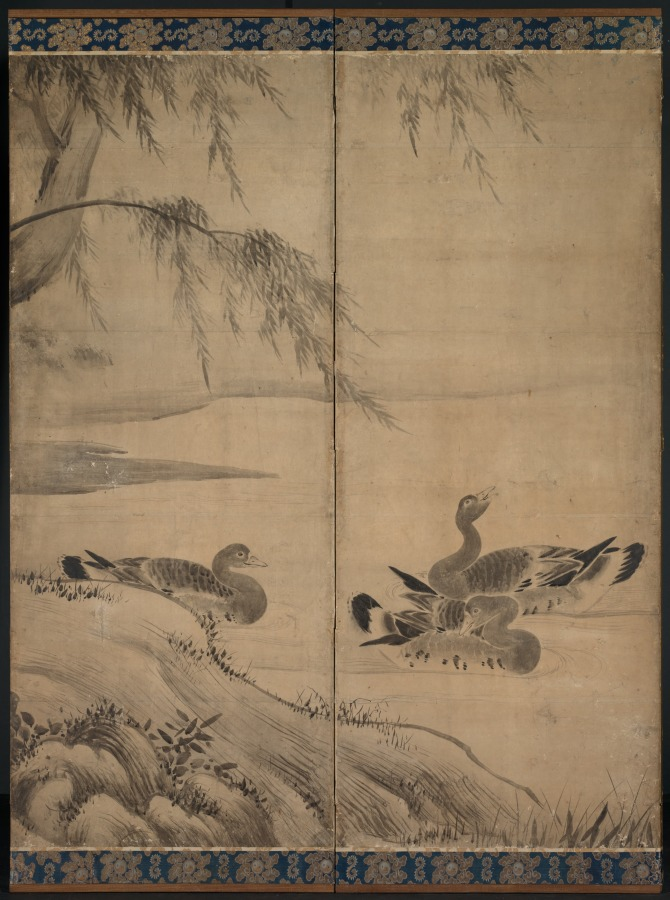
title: Wild Geese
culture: Japan, Edo period (1615–1868)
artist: Kano Sanraku (Japanese, 1559–1635)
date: late 1500s-early 1600s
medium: pair of six-fold screens; ink on paper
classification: Painting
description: Depictions of geese usually appear as ink paintings in Japan during the 1200s. They later show up in the colorful landscapes of illustrated handscrolls. Such early ink renditions of the birds have long been associated with classical Chinese Zen painting and poetry, which was avidly admired and collected in medieval Japan. In the screens on display, the artist portrayed the waterfowl in a pastoral setting without reference to classical or religious themes. Such ordinary subjects were imbued with special meaning in 14th- and 15th-century Japan through associations with continental culture, Zen thought and poetry, and famous Chinese monk-painters whose painting techniques had become revered as visual emblems of Zen principles. The screens here reflect the continuation of that painting tradition in the late 1500s or early 1600s by the head of the most important studio in Kyoto. Sanraku also executed a number of colorful folding screen compositions, but here pays homage to the style of early Zen painting.